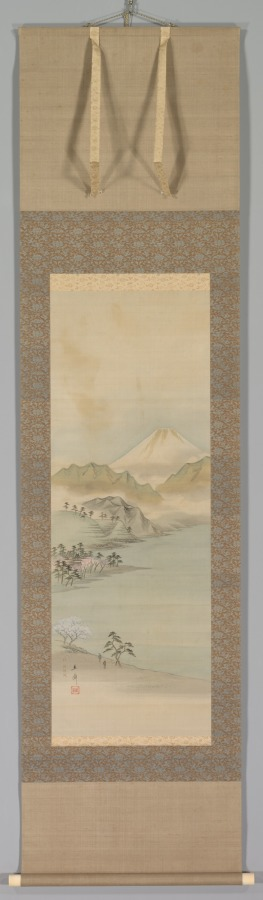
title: Lake Suwa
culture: Japan, Edo period (1615–1868)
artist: Utagawa Hiroshige (Japanese, 1797–1858)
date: c. 1832–58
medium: hanging scroll; ink and color on silk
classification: Painting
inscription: 立斎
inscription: 廣重